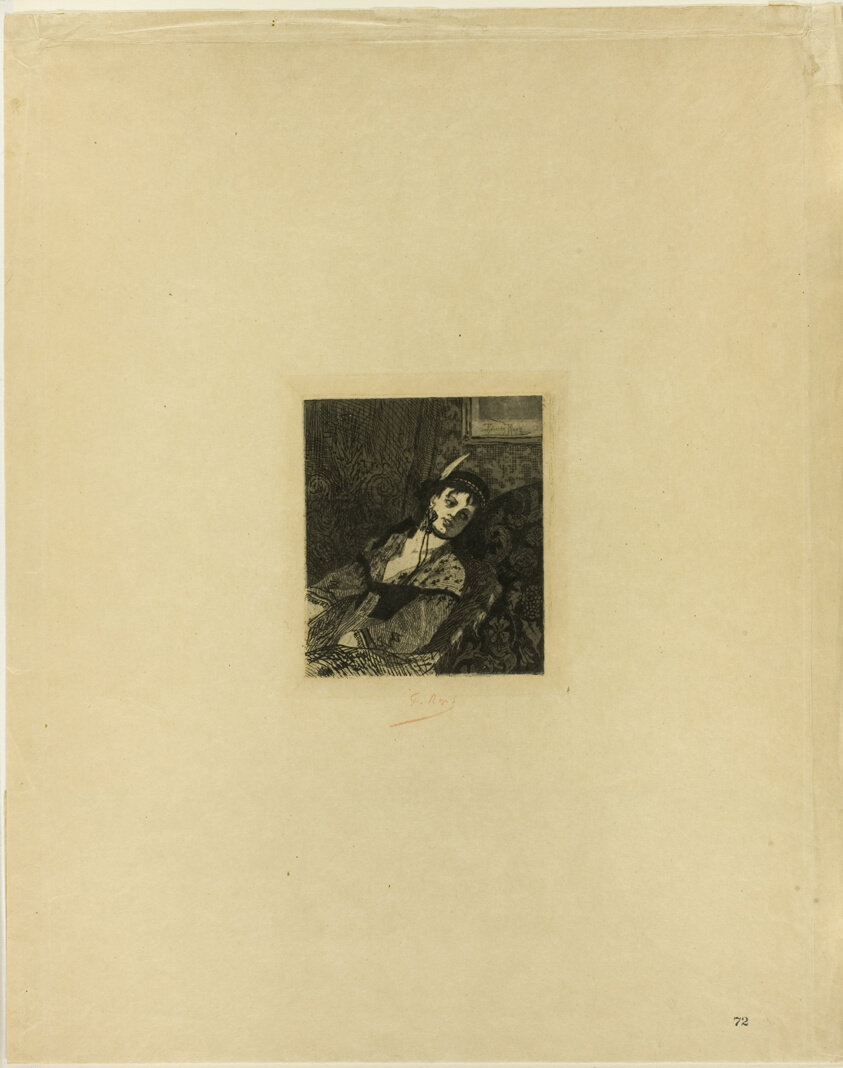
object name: Print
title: Woman with a Scottish Hat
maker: Félicien Rops (Belgian, 1833-1898); published by Edmond-Honoré Sagot (French, 1857-1917)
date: 1865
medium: Etching from a steel plate on cream wove paper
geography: Belgium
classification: etching; print; prints and drawing